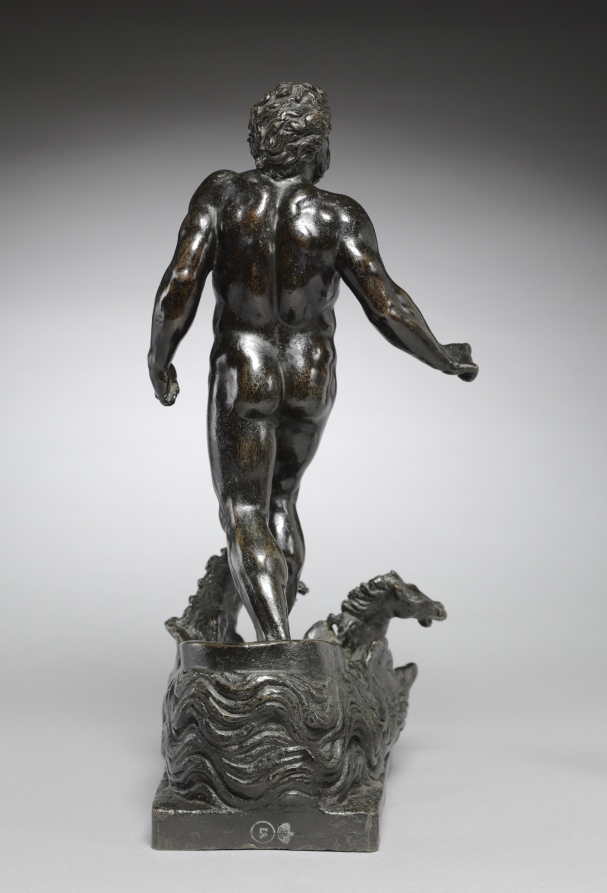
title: The Wrath of Neptune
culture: Italy, 16th century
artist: cast after a model by Tiziano Minio (Italian, 1511/12–1552)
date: late 1500s to early 1600s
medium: bronze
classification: Sculpture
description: In Roman mythology, Neptune (or Poseidon in Greek mythology) is the god of flowing water and is believed to protect against droughts. This small bronze is likely a sculptural representation of the Wrath of Neptune from the Aeneid. During the Trojan War, Juno incited winds to sink Trojan ships. Infuriated by Juno's incursion into his domain of the sea, Neptune rides out in his chariot, saving the Trojan army and threatening to punish the winds for their insolence. The massive, muscular nude male figure stands upright on his seahorse-drawn chariot, twisting to face the wind. The turbulent waves and the windblown hair and beard of the figure give life to this small bronze. The figure's left hand would have originally held reins, while the right hand, which once held a trident, is outstretched in the act of commanding the waves to be still. This bronze was once attributed by art historian Wilhelm von Bode to Jacopo Sansovino based on its similarity to known works, such as the over-life-size marble figure of Neptune of the Scala di Giganti outside of the Doge's Palace in Venice. However, by 1921 Leo Planiscig had noted the CMA Neptune's similarity to bronzes and reliefs by Sansovino's pupil, Tiziano Minio, in the Loggetta at San Marco Square, Venice. In Minio's Jupiter on the Island of Candia for the Loggetta, the waves are represented with the same incised, undulating grooves as in this work. Neptune possesses the same stocky proportions and heavy musculature which was characteristic of Minio. The high polish and sweeping contours of the figure are characteristic of Sansovino, but the heightened drama of the subject display Minio's stylistic advancement from his teacher.